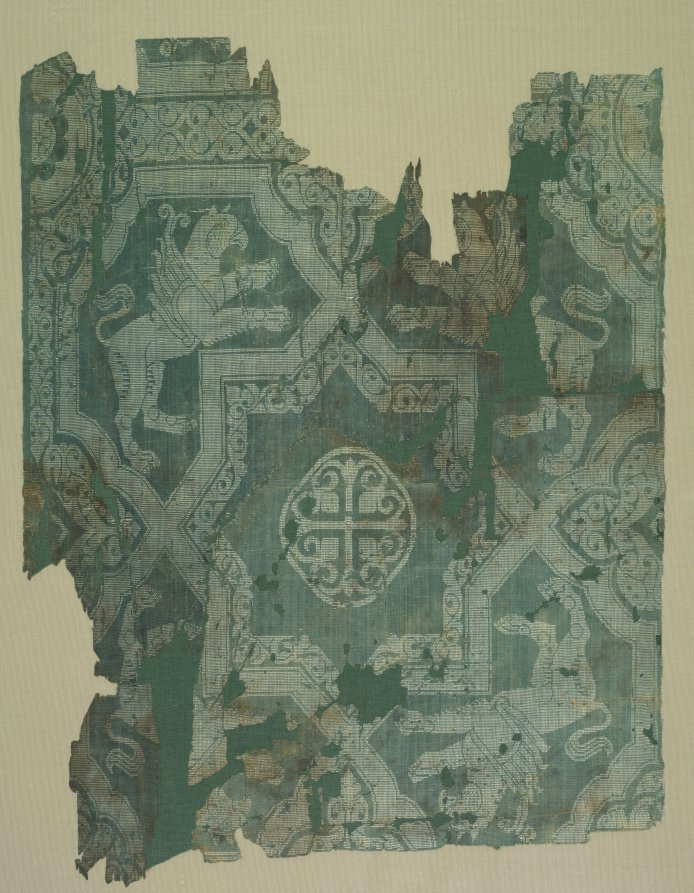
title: Fragment with star pattern and griffins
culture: Iraq or Iran, Buyid period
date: 950–1050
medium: silk: plain weave variation with supplementary weft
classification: Textile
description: This fragment's design consists of interlaced bands, bordered with inner band of foliate ornament, forming an eight-pointed star with center of floriated cross and flanked in four corner compartments by winged griffins. It was woven in green and white silk. The warp in green silk has two wefts, one of green silk and one of white silk floss for the design.